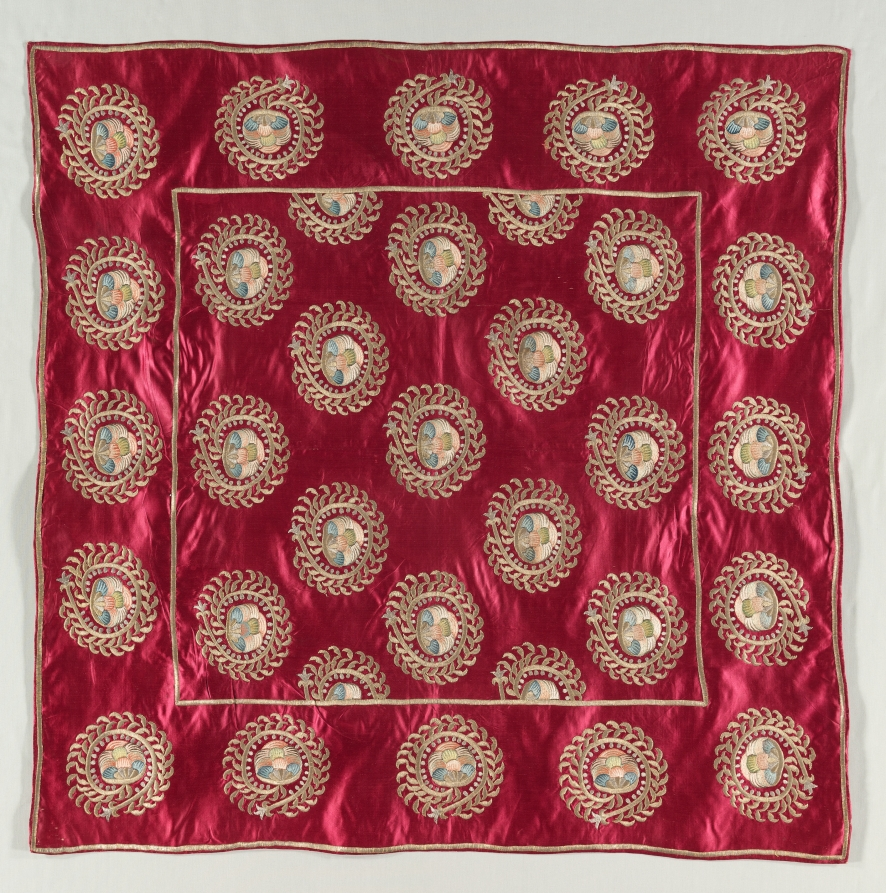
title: Embroidered Square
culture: Turkey, 19th century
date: 19th century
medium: embroidery: silk and gold and silver filé on silk ground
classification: Embroidery